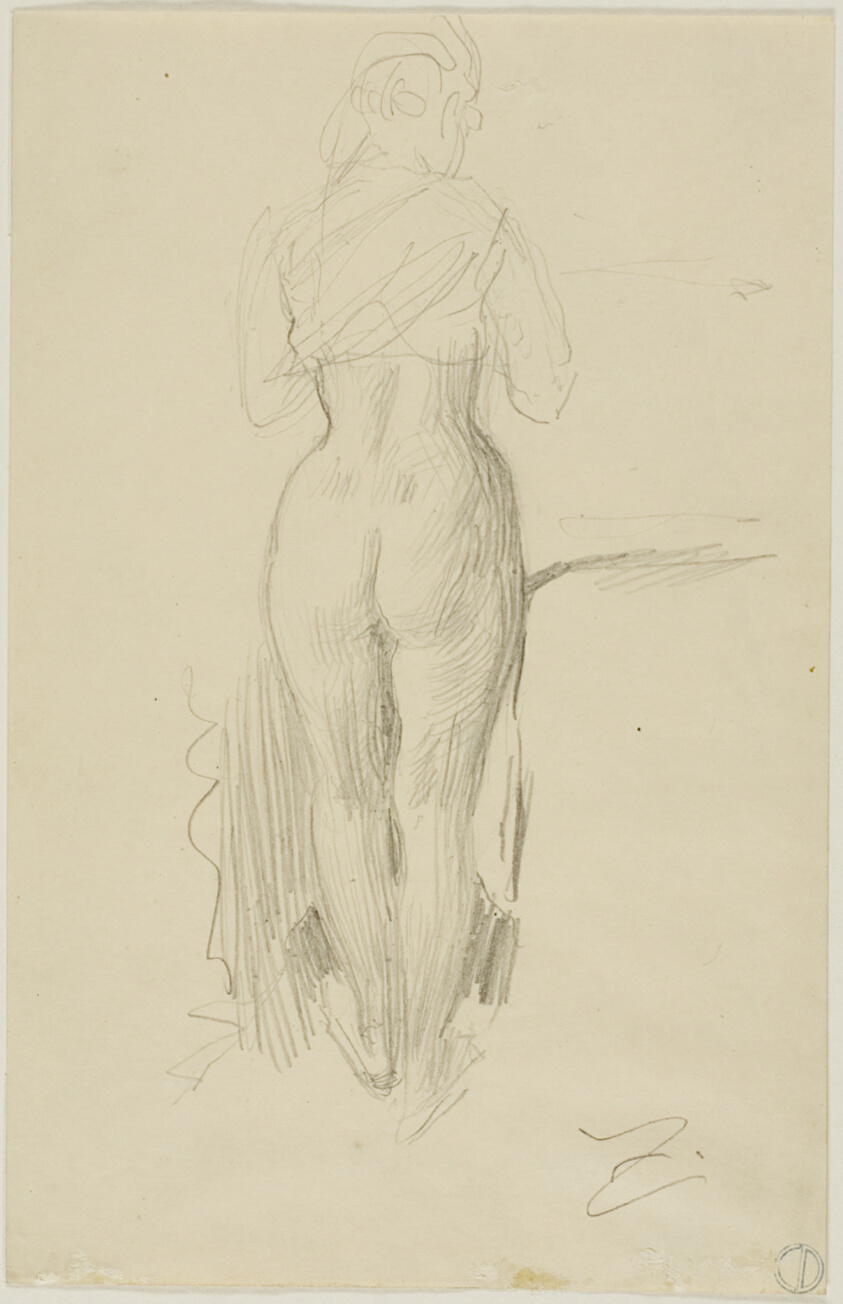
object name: Drawing and Watercolor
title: Standing Female Figure Seen from Behind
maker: Anders Zorn (Swedish, 1860-1920)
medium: Graphite on cream wove paper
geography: Sweden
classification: graphite; drawings (visual works); prints and drawing